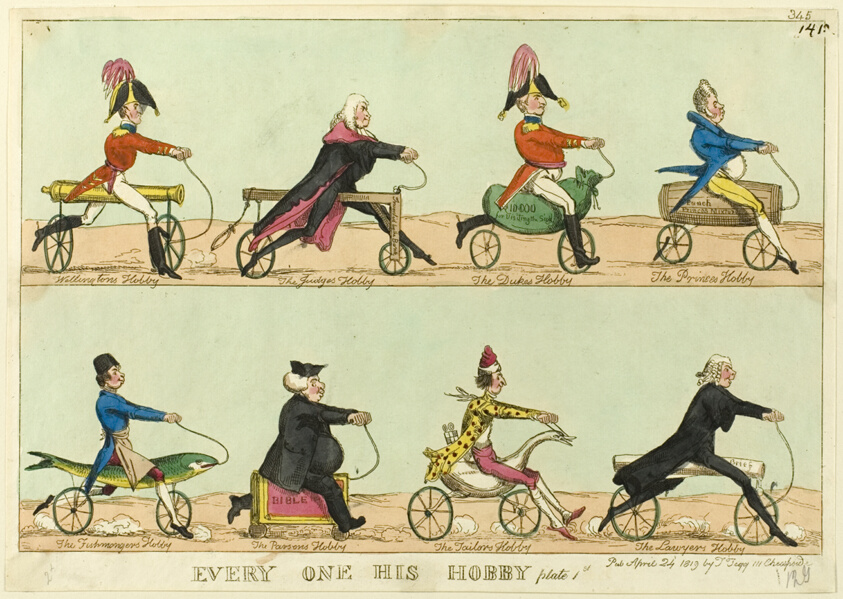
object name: Print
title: Everyone His Hobby, plate 1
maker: Attributed to William Heath (English, 1794-1840); published by Thomas Tegg (English, 1776-1845)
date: published April 24, 1819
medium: Hand-colored etching on ivory wove paper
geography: England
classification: etching; print; prints and drawing